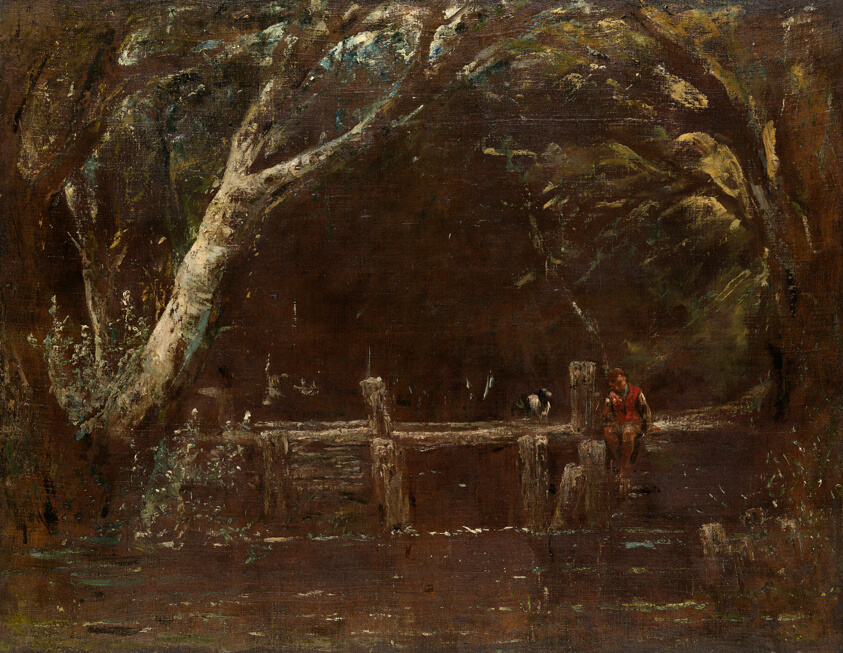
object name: Painting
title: Landscape (The Lock)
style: 19th century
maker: Attributed to John Constable (English, 1776–1837)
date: c. 1820–25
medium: Oil on canvas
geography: England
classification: painting; french; oil on canvas; oil paintings (visual works); paint; european painting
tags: landscapes, boys, figure, dog, trees, water